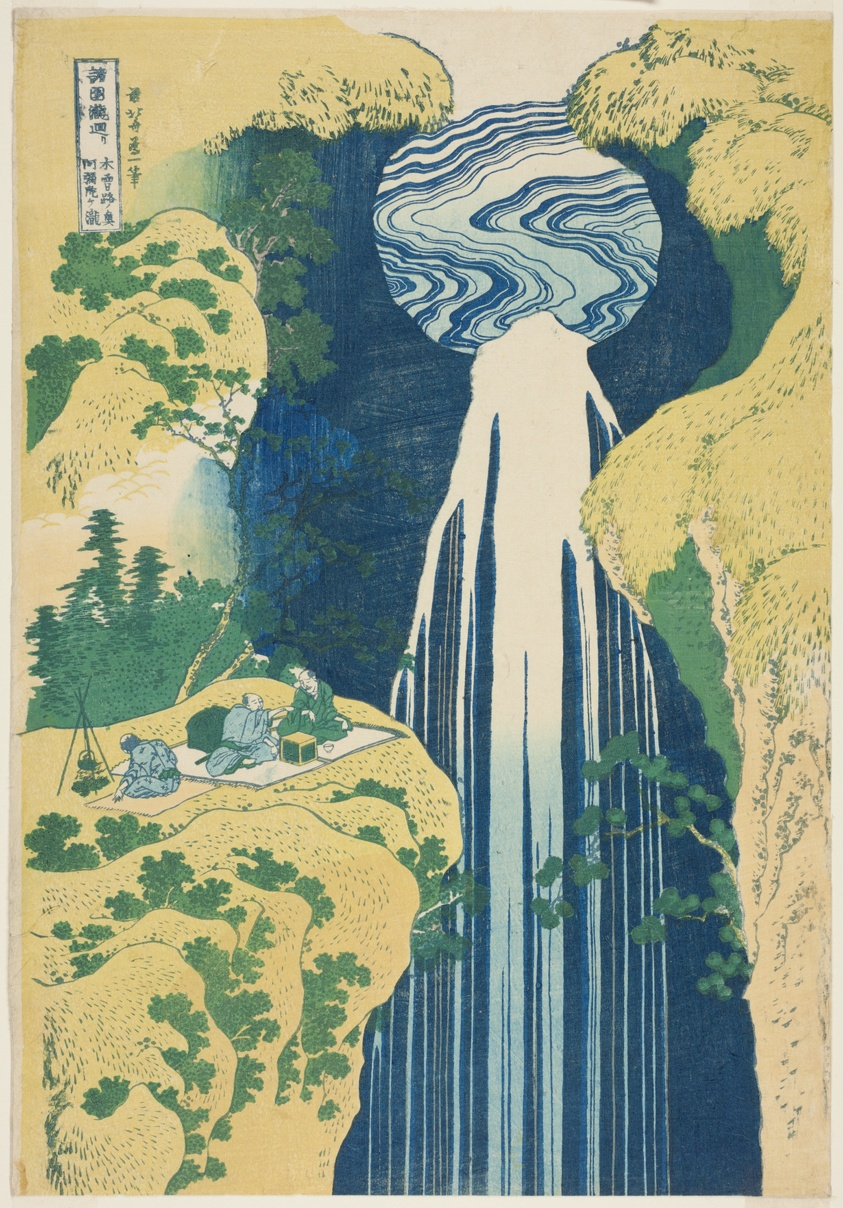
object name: Print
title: Amida Falls in the Far Reaches of the Kisokaido (Kisoji no oku Amidagataki), from the series "A Tour of Waterfalls in Various Provinces (Shokoku taki meguri)"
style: Japanese (culture or style)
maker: Katsushika Hokusai 葛飾 北斎; Japanese, 1760-1849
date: About 1833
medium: Color woodblock print; ōban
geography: Japan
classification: woodblock print; print; asian art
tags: landscapes